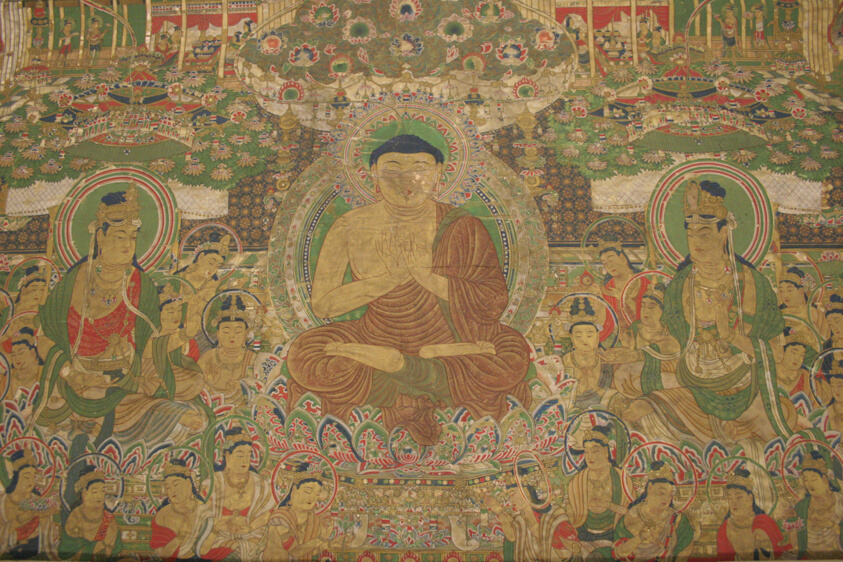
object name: Painting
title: Taima Mandala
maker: Unknown Artist (Japanese, Edo period (1615-1868))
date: Late 18th century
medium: Color and ink with gold on silk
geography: China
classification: ink or chalk wash; painting; asian art